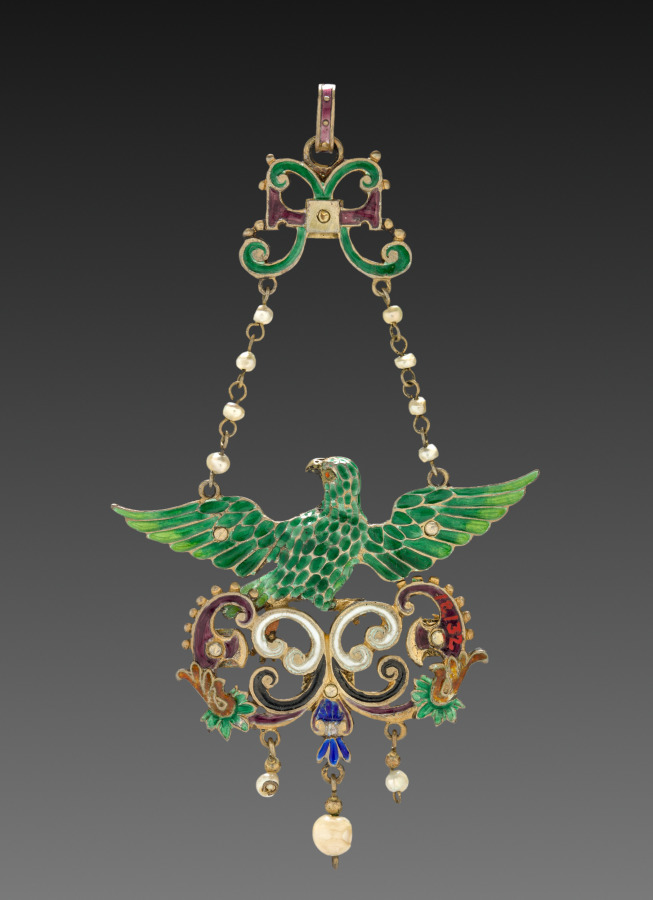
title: Pendant and Chain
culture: Germany, 19th century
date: 1800s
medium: metal and enamel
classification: Jewelry